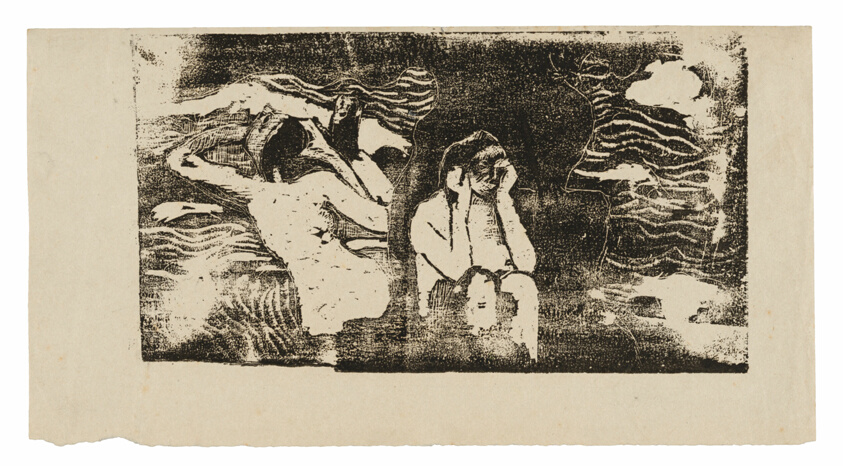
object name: Print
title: At the Black Rocks, from the Suite of Late Wood-Block Prints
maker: Paul Gauguin (French, 1848-1903)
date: 1898/99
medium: Wood-block print in black ink on cream wove paper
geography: France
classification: woodcut; print; prints and drawing